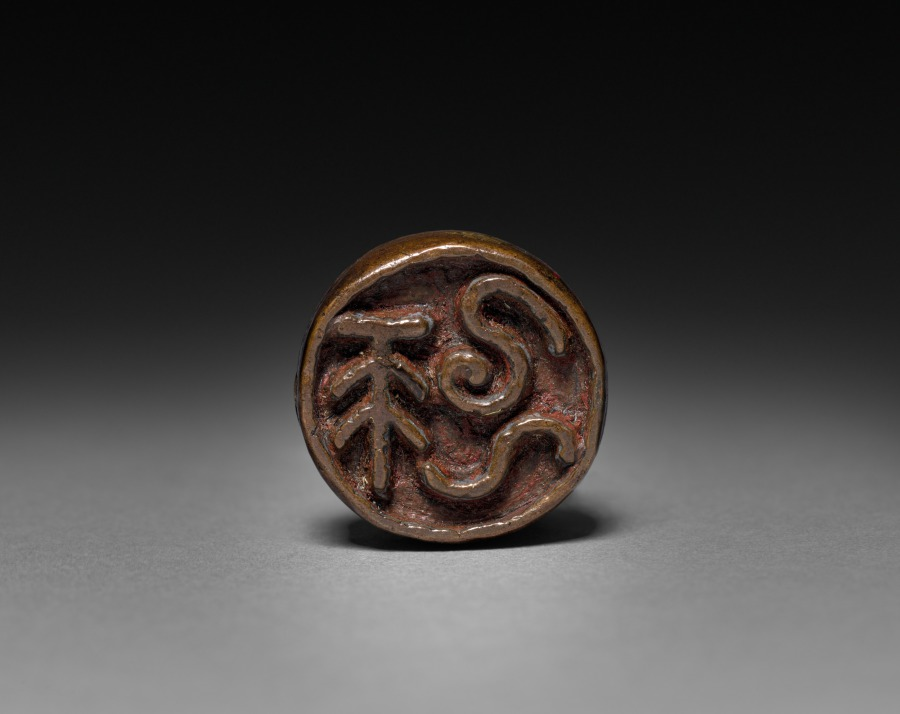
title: Seal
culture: China, Ming dynasty (1368-1644) or earlier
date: 1368– 1644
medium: bronze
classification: Metalwork